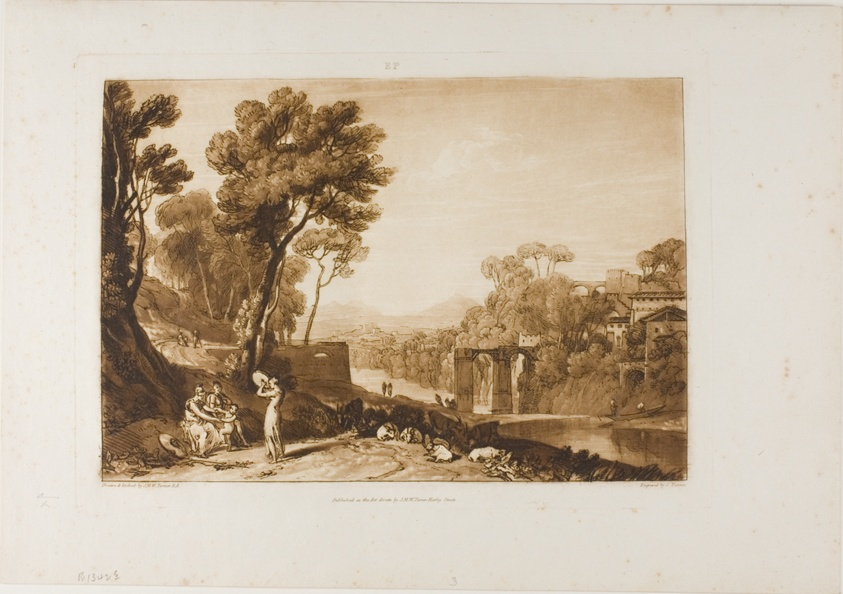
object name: Print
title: The Woman and Tambourine, plate 3 from Liber Studiorum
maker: Joseph Mallord William Turner (English, 1775-1851); Engraved by Charles Turner (English, 1773-1857)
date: published 1807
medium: Etching and engraving in brown on ivory laid paper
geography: England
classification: etching; print; prints and drawing